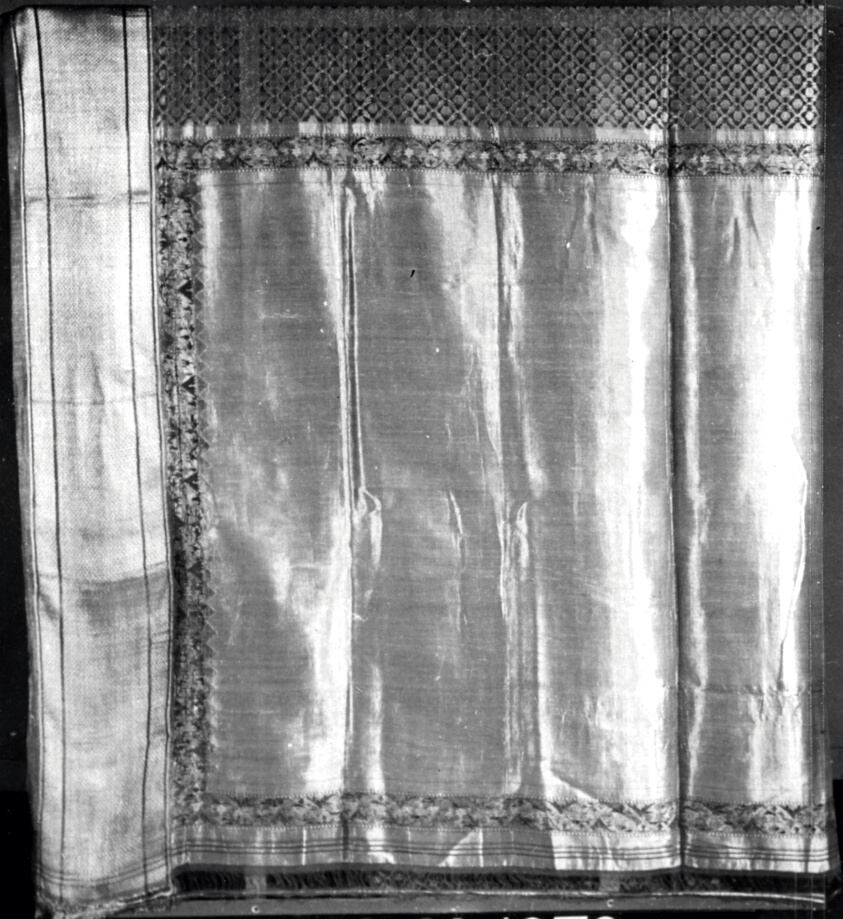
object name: Costume and Accessories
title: Sari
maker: India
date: 18th/19th century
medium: Red silk and gold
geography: India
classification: textile; weaving; costume; dress (garment); clothing; sari (garment)